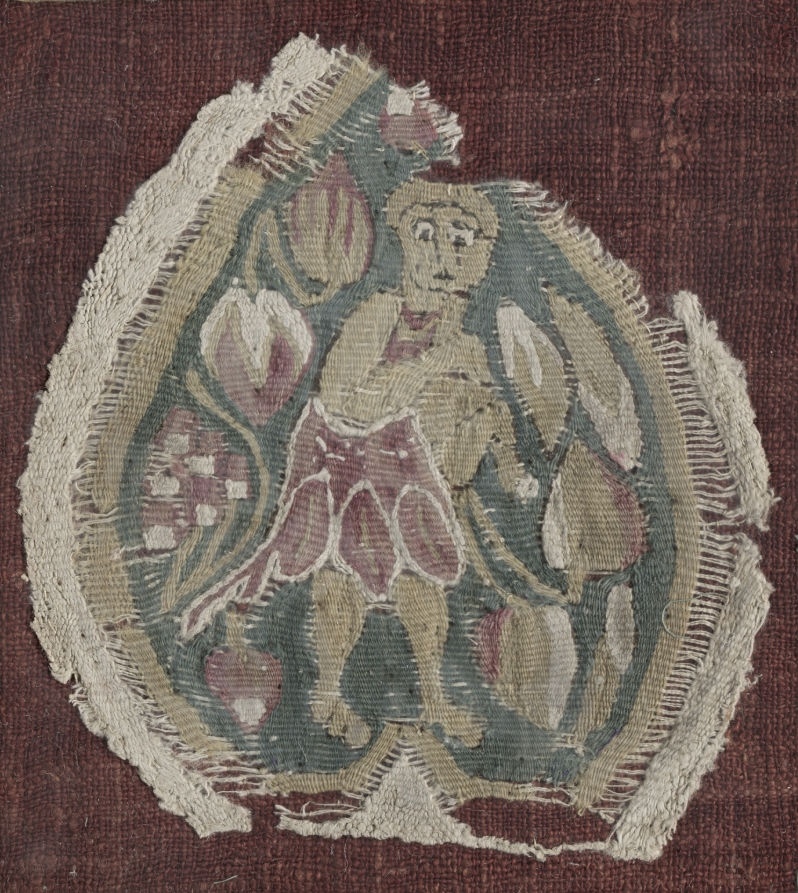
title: Spade-shaped Ornament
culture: Egypt, 7th - 8th century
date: 600s - 700s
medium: tapestry (originally inwoven in tabby ground); linen and wool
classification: Textile